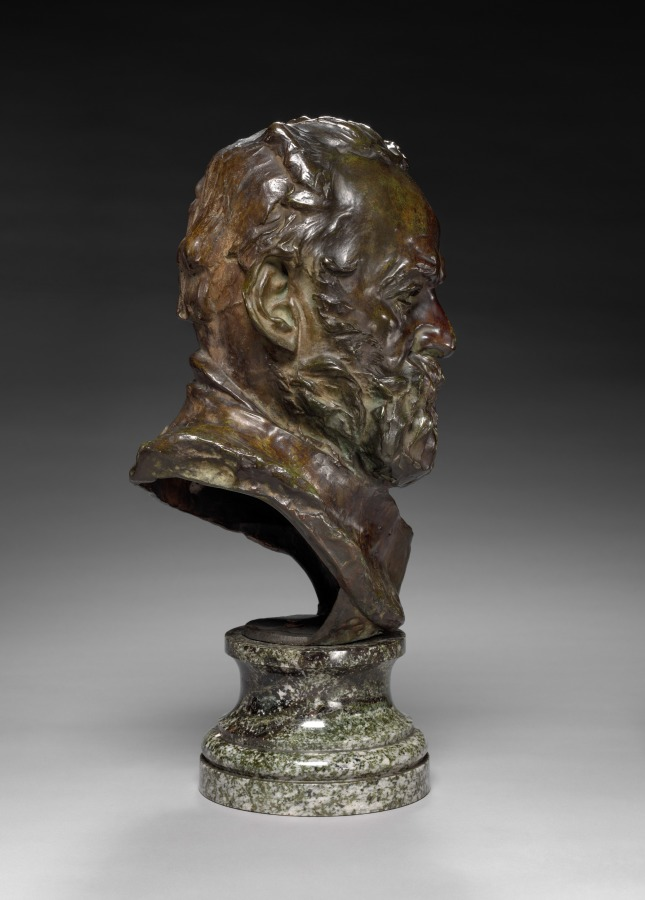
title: Bust of Victor Hugo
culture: France, 19th century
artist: Auguste Rodin (French, 1840–1917)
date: 1883 modeled; cast by 1917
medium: bronze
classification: Sculpture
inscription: inscribed on back: "A. Rodin" signed "Rodin" (back, lower left)